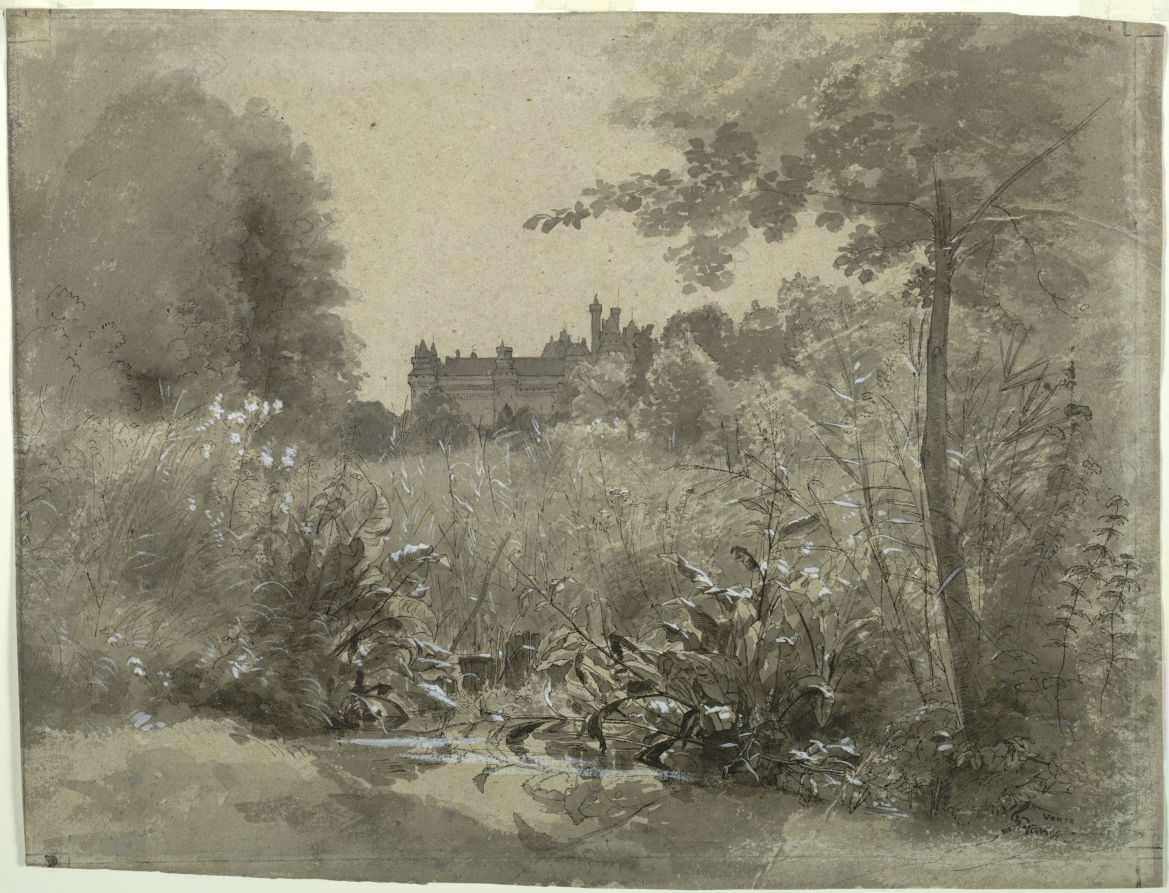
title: View of the Château of Pierrefonds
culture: France, 19th century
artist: François-Louis Français (French, 1814–1897)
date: c. 1870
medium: pen and black ink, brush and black and gray wash, and graphite, heightened with white gouache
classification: Drawing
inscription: verso, center, in graphite: 12 [underlined]; center right, in graphite: Chateau de Pierrefonds / Clisson [crossed out]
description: This lush landscape shows the château of Pierrefonds in the distance framed by flourishing foliage in the foreground. The picture depicts the château from the same viewpoint as in a painting by Camille Corot (see photo), an artist who significantly influenced Français. (Corot is represented in the exhibition by a charcoal drawing [cat. no. 45] hanging nearby.) Corot's picture of Pierrefonds shows the château in ruins, whereas the pristine condition of the building in Français's view indicates that his drawing dates after the château's extensive restoration by the architect Viollet-le-Duc in 1870.